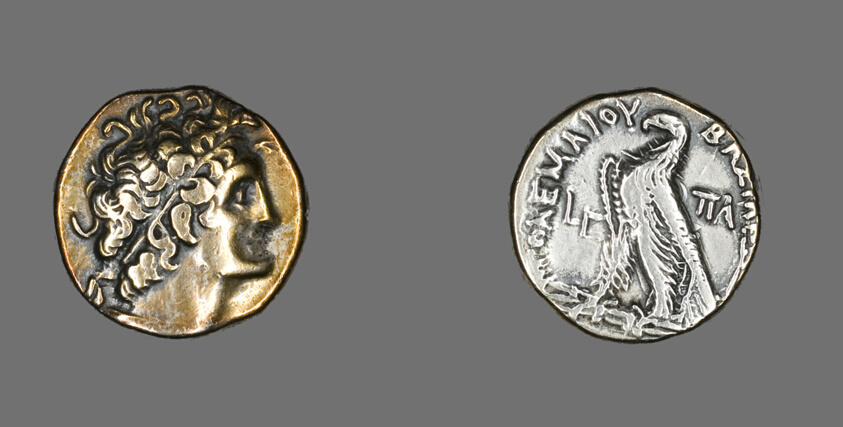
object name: Coin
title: Tetradrachm (Coin) Portraying Ptolemy I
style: ptolemaic, ancient, greek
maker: Greek, Ptolemaic; Minted in Paphos, Cyprus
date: 176-175 BCE, Reign of Ptolemy VI (181–145 BCE)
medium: Silver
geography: Cyprus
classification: coin; ancient art